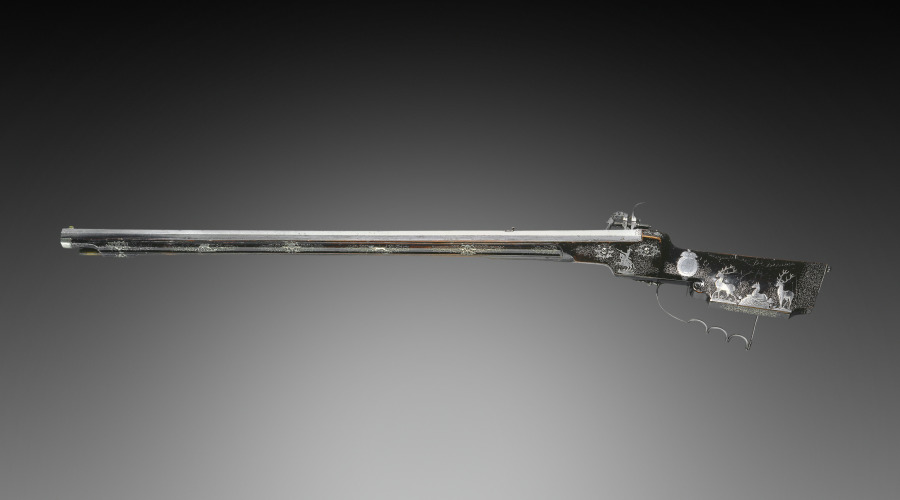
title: Wheel-Lock Hunting Rifle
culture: Austria, Ferlach, mid 17th Century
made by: Hans Schmidt (Austrian, 1669)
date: mid-1600s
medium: steel, varnished wood (walnut) stock decorated with inlaid silver wire and appliqués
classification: Arms and Armor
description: The barrel of this hunting piece is marked with the letters "GS" within a shield, the likely initials of the owner, who was probably a member of the Order of the Golden Fleece as indicated by the escutcheon on the stock.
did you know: A similar rifle made for another member of the Order of the Golden Fleece, Graf Sigmund von Dietrichstein, is preserved in Vienna.